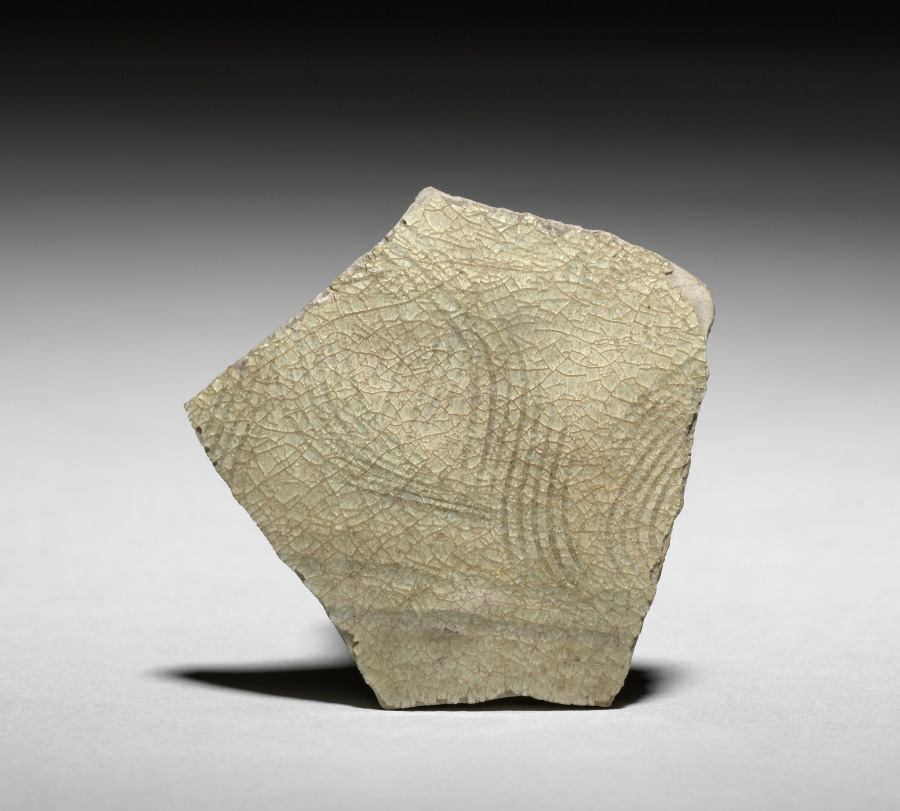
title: Pottery Fragment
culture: Siam, Sawankhalok ware, late 13th-14th Century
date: late 1200s-1300s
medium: stoneware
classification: Ceramic